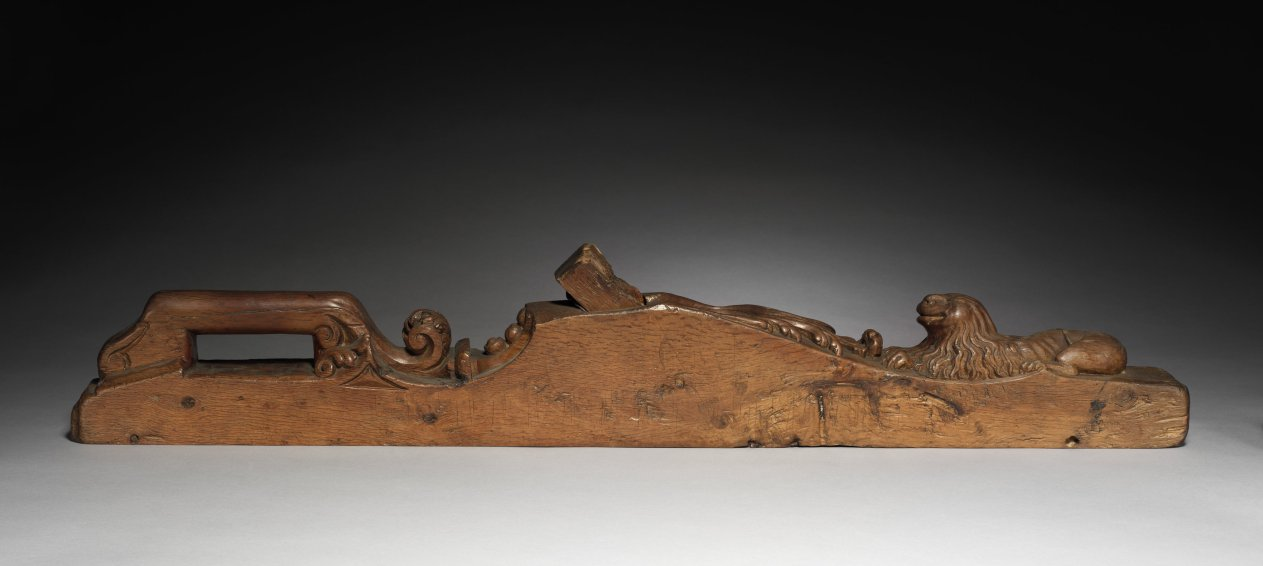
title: Plane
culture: Spain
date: 1600s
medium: oak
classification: Tool